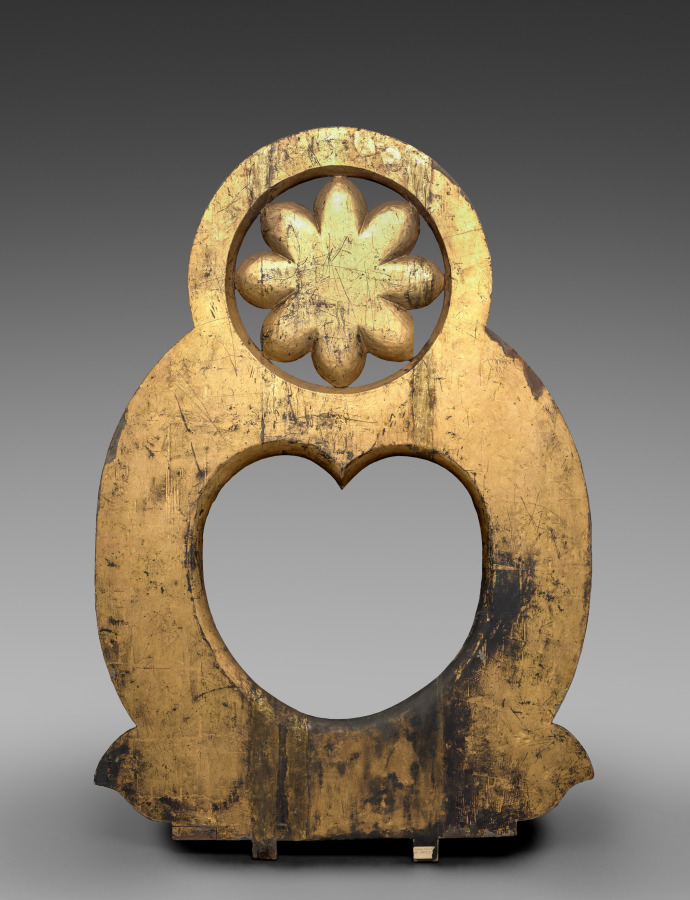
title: Seated Buddha (mandorla)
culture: Japan, Heian period (794–1185)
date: 1100s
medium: gilded wood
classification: Sculpture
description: Composed of a number of hollowed-out pieces of wood that were then covered with lacquer and gilding, this sculpture served as an image of worship in one of the small temples surrounding Kōfukuji, a major Buddhist temple in Nara, Japan. Like many Buddhas, this figure has its right hand positioned in a gesture meaning "fear not." The left hand is a replacement, so its original gesture, a clue to this Buddha's identity, is unknown. However, as the left foot is exposed over the garment, in lotus position, it may have been created as a Medicine Master Buddha, Yakushi Nyorai in Japanese, or the Buddha of our era, Shakyamuni.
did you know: This halo may not have originally belonged to this sculpture.